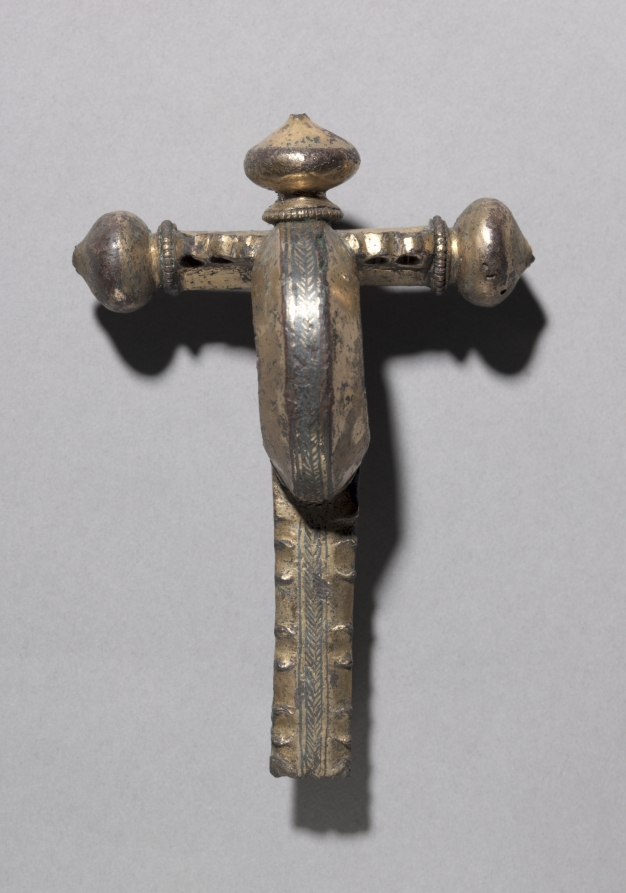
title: Crossbow Fibula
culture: Gallo-Roman or Romano-British, Migration period, 4th century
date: c. 350–400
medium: bronze, gilt-bronze, silver, and niello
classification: Jewelry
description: A fibula was a garment clasp that functioned somewhat like a modern safety pin. Since buttons were not used in antiquity, fibulae were used to keep a cloak closed. They were worn by both men and women, commonly on the right shoulder, and produced in various sizes and shapes. Because they were highly visible accessories, they often received decorative gilding, inlay decoration, or onion-shaped domes. Crossbow fibulae were introduced by the Romans and are named for their resemblance to the weapon. Decorative and technical features suggest this may have been made in Roman-occupied Britain.